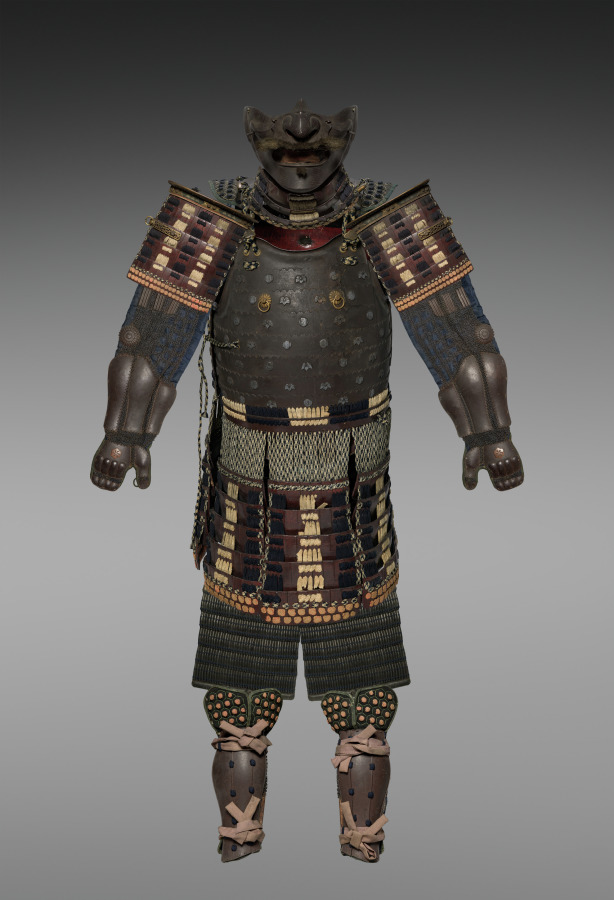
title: Suit of Armor (Gusoku-type)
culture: Japan, Edo period (1615–1868)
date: 1600s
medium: Iron, lacquer, textile (silk)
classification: Arms and Armor